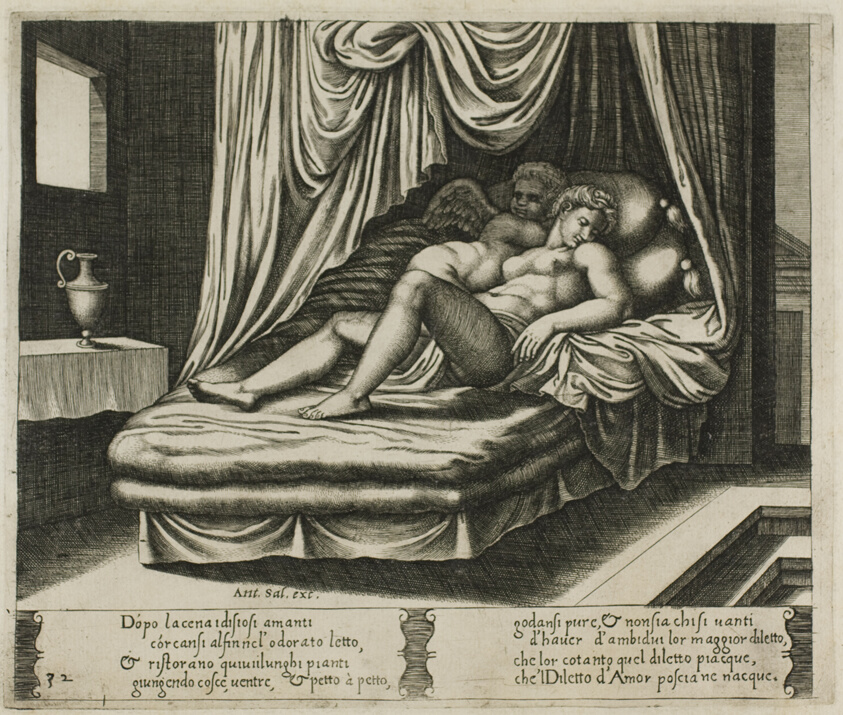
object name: Print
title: Cupid and Psyche Together in the Nuptial Bed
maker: Master of the Die (Italian, active c. 1530-1560); after Michiel Coxcie I (Flemish, 1499-1592); in turn, inspired by Raffaello Sanzio, called Raphael (Italian, 1483-1520)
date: 1530/40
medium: Engraving in warm brown ink on cream laid paper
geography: Italy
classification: engraving; print; prints and drawing